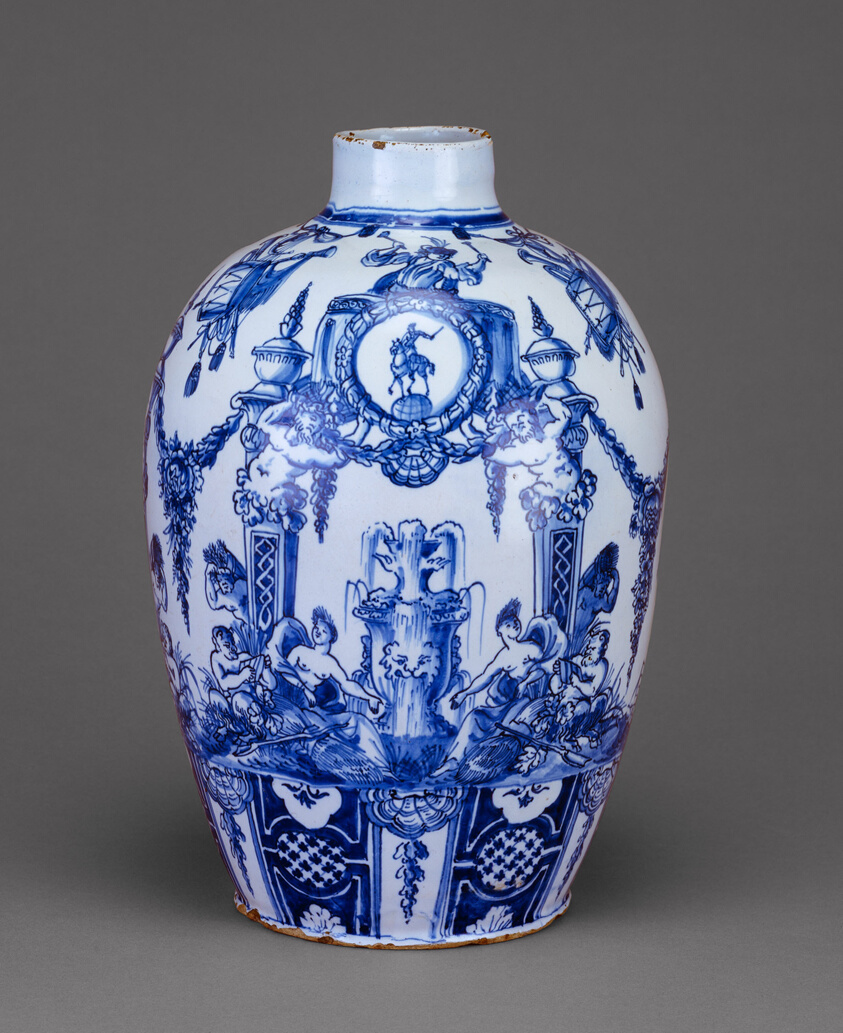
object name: Ceramics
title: Vase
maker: Attributed to De Grieksche A (The Greek A) Factory; Delft, Netherlands, 1658–1811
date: c. 1690–1700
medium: Tin-glazed earthenware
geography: Delft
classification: vase; vessel; ceramics; european decorative arts